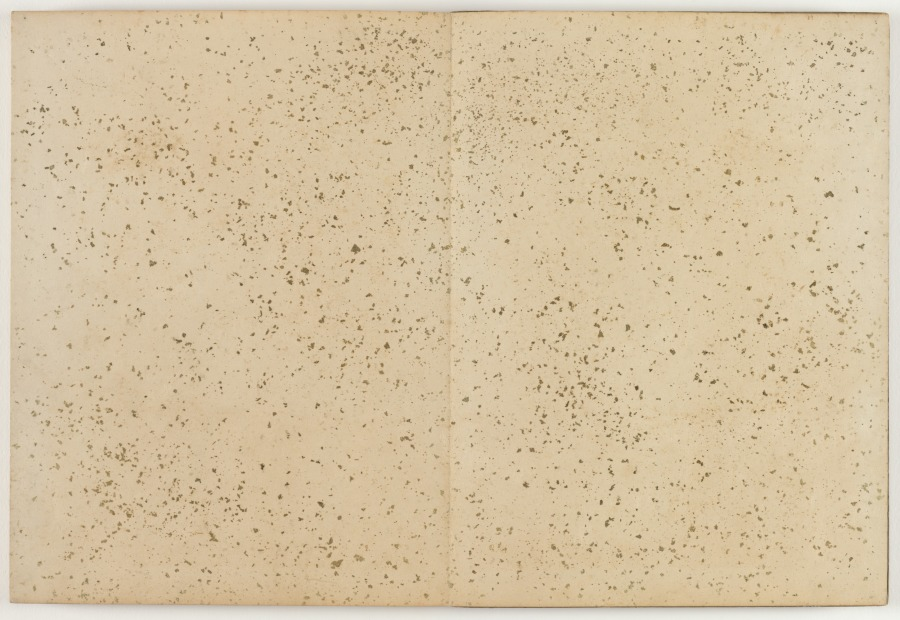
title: Flowers of a Hundred Worlds (Momoyogusa), Vol. 3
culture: Japan, Meiji period (1868–1912)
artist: Kamisaka Sekka (Japanese, 1866–1942)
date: 1909–10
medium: one of a set of three woodblock printed folding-books; ink, color, gold, and silver on paper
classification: Bound Volume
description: This volume from a set of three woodblock printed albums displays the graphic design prowess of Kamisaka Sekka. The images were first distributed one by one to subscribers to the series but later were reissued in bound form, like this book, for mass consumers. Each print features a vignette taken from nature or Japanese literature. Many of the scenes have a long history in Japan, originating in the 900s or 1000s and having been interpreted by all manner of artists since that time. Sekka’s selections hew closely to precedents from the Rinpa style originated by painter Tawaraya Sōtatsu (c. 1570–c. 1640) and calligrapher Hon’ami Kōetsu (1558–1637).